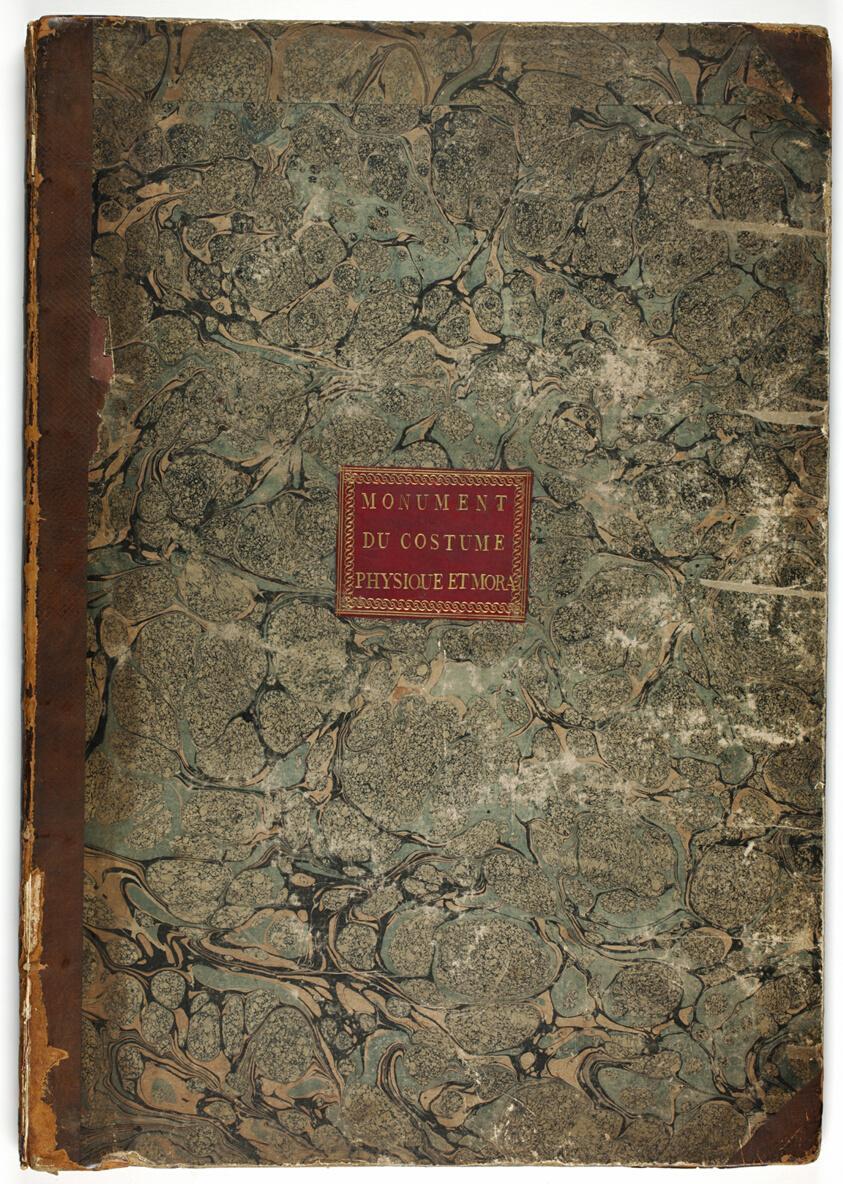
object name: Book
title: Monument du costume physique et moral de la fin du dix-huitième siècle ou tableaux de la vie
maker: Moreau, Jean Michel (French, 1741-1814); printed by Prault (French, 18th century)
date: 1789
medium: Book bound with ivory laid papers, silk-lined endpapers, and bound of red leather with gold stamping; the prints have been cut from the text.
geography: Paris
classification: book; prints and drawing